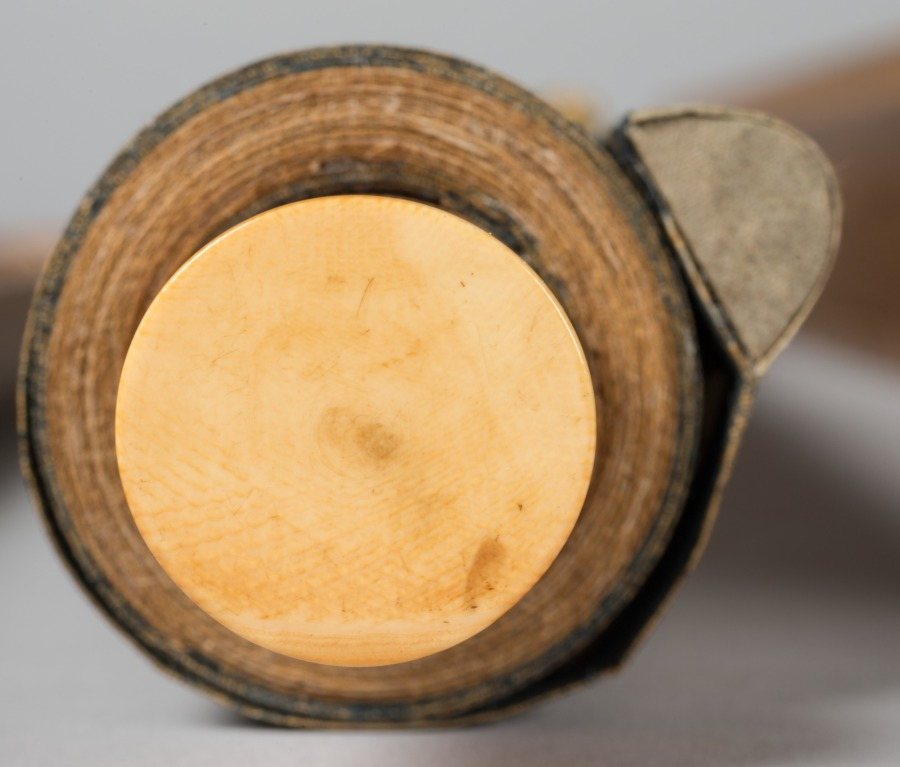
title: Emperor Minghuang Teaching Yang Gueifei to Play the Flute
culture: Japan, Muromachi period (1392–1573)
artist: Choryusai (Japanese)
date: late 1400s–early 1500s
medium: hanging scroll; ink and color on paper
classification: Painting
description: Minghuang, a prominent emperor of Tang (618-906) China and his consort, Yang Gueifei, have inspired many legends, paintings, and poetry in later Chinese culture. Through the study of Chinese literature and the collecting of Chinese paintings, tales of their lives and romance became well-known in Muromachi Japan.